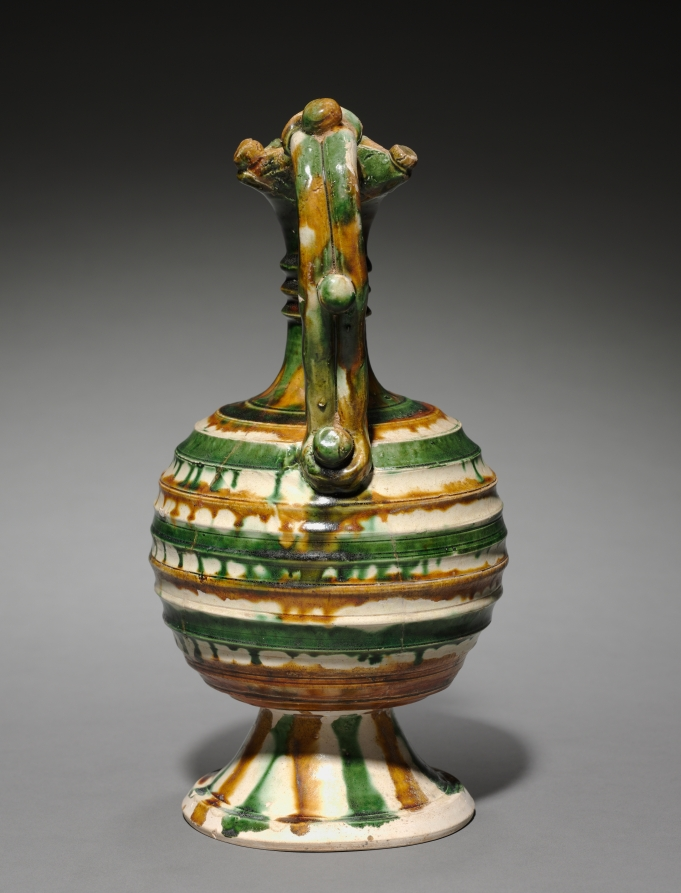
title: Ewer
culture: China, Tang dynasty (618-907)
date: 700–750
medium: glazed earthenware, sancai (three-color ware)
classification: Ceramic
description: Many sancai or "three-color" lead-glazed wares-such as this ewerare notable for their heavy dependence on metalwork prototypes. Such polychrome glazed wares were intended for the tomb.